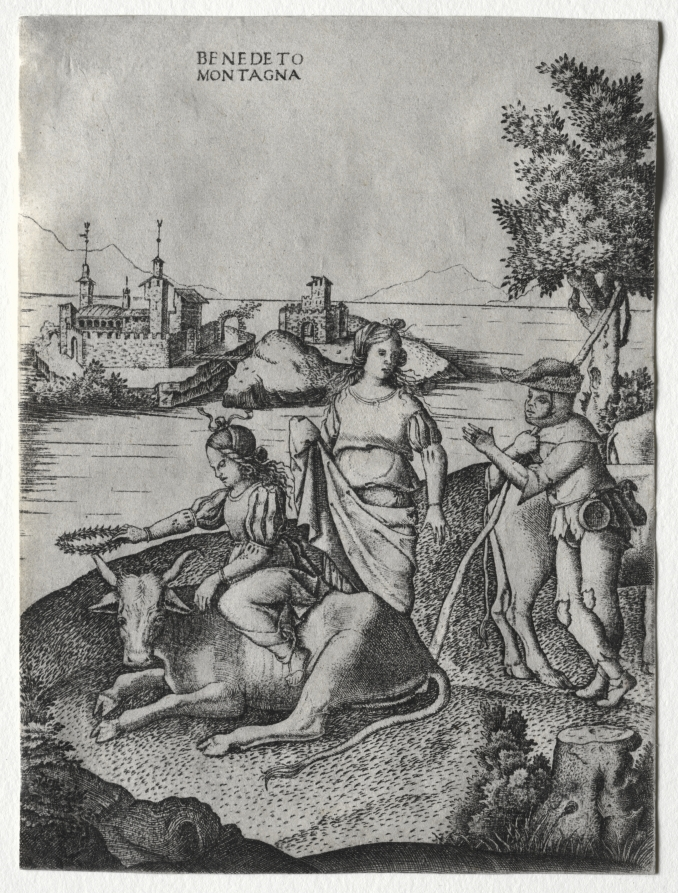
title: Rape of Europa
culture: Italy, 16th century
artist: Benedetto Montagna (Italian, c. 1481–1555/58)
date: c. 1515–1520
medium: engraving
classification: Print